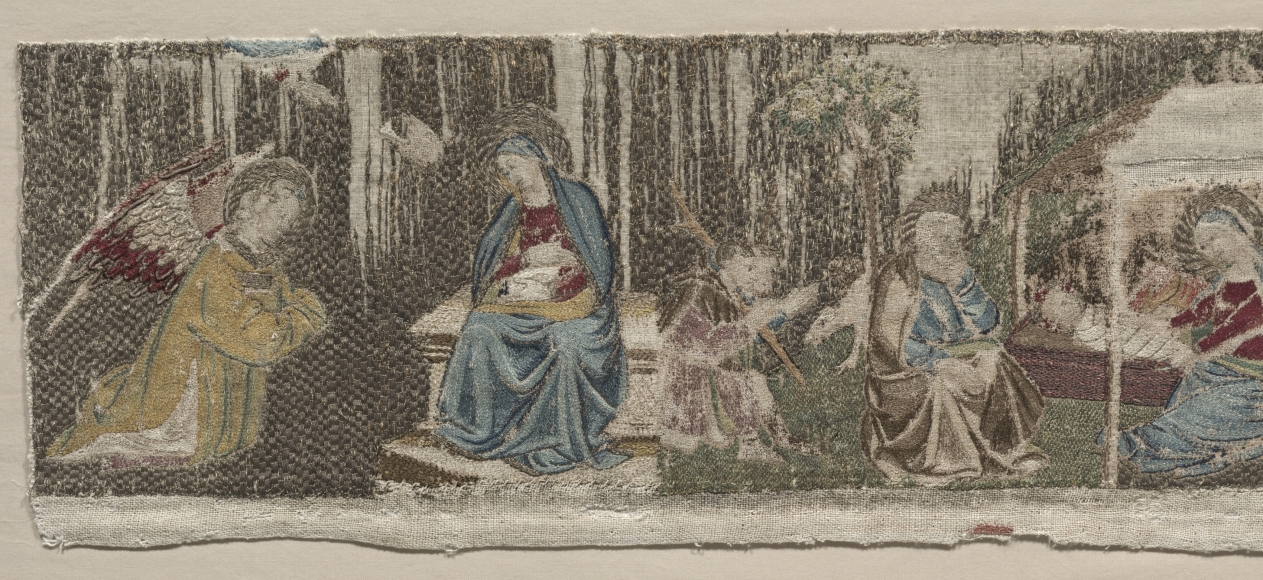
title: Scenes of the Life of the Virgin, from an Altar Frontal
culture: Italy, Florence, 14th century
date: 1330s or 1340s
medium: Silk, gold thread, linen; raised work, embroidery: split, stem, running, fishbone, and couching stitches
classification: Embroidery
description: This rare panel originally hung above a large embroidery that decorated the front of an altar in a church. The narrative begins with the Virgin’s parents and her early life; that panel is now in the Toledo Museum of Art. Cleveland’s portion continues the story with the Annunciation of the Virgin, Adoration of the Shepherds, Adoration of the Magi, Presentation of Christ, Christ among the Doctors, and the Assumption of the Virgin. The Death of the Virgin scene is likely missing. Painters usually sketched designs on stretched linen for embroiderers. Gold thread enriches the background and is secured in place with couching stitches in a small brick pattern.